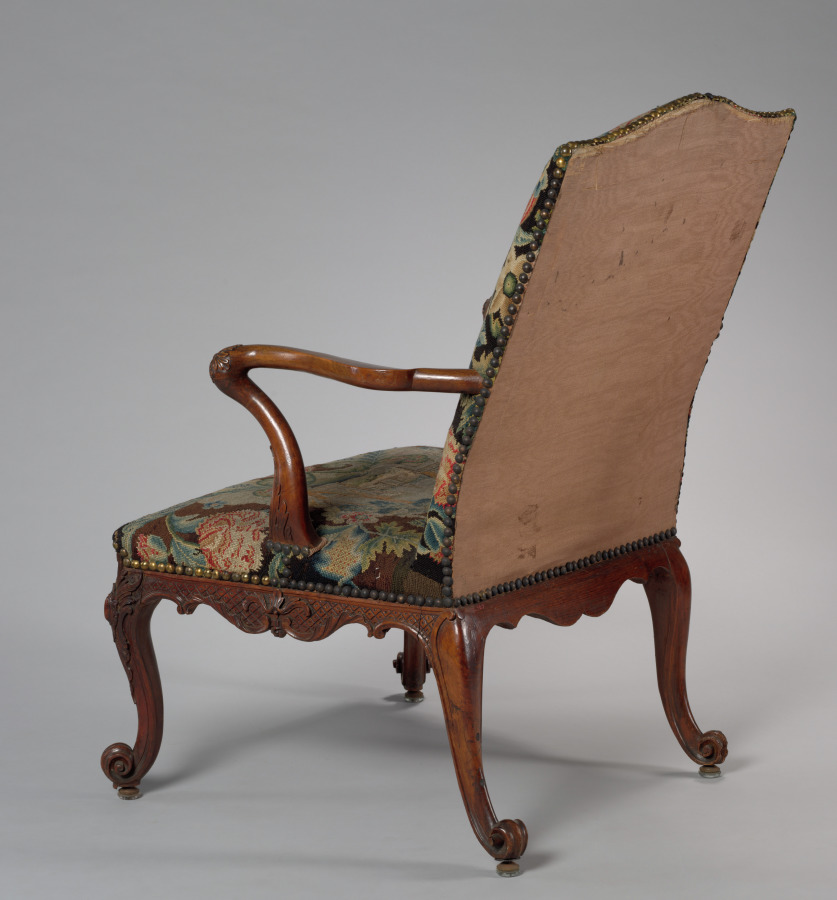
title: Armchair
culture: England, 18th century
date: 1760–1765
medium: mahogany upholstered in needlework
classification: Furniture and woodwork